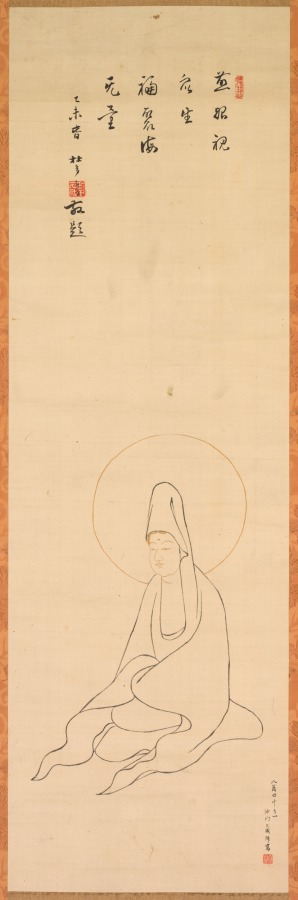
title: White-Robed Guanyin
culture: China, Yuan dynasty (1271-1368)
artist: copy after Jueji Yongzhong (Chinese, active around 1300)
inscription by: Zhongfeng Mingben (Chinese, 1263–1323)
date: late 1200s–early 1300s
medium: hanging scroll; ink and gold on silk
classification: Painting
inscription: Inscription: one of the 84,000 painted by the priest Insei.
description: The original model for this ink drawing of Guanyin, the bodhisattva of infinite compassion (Avalokiteshvara in Sanskrit), is CMA 1978.47.1. This drawing is a later copy with the same image of the White-Robed Guanyin, but in reverse. The inscription above reads: one of the 84,000 painted by the priest Insei. The inscription seems to indicate that the Japanese priest Insei repeatedly copied the image of the bodhisattva in an act of piety and to accumulate merit, as is promised in the Lotus Sutra for anyone who paints images of the Buddha, they “will achieve the Buddha path.” The priest’s name and seal need further study and identification.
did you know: The bodhisattva's face and halo were delicately painted in gold.